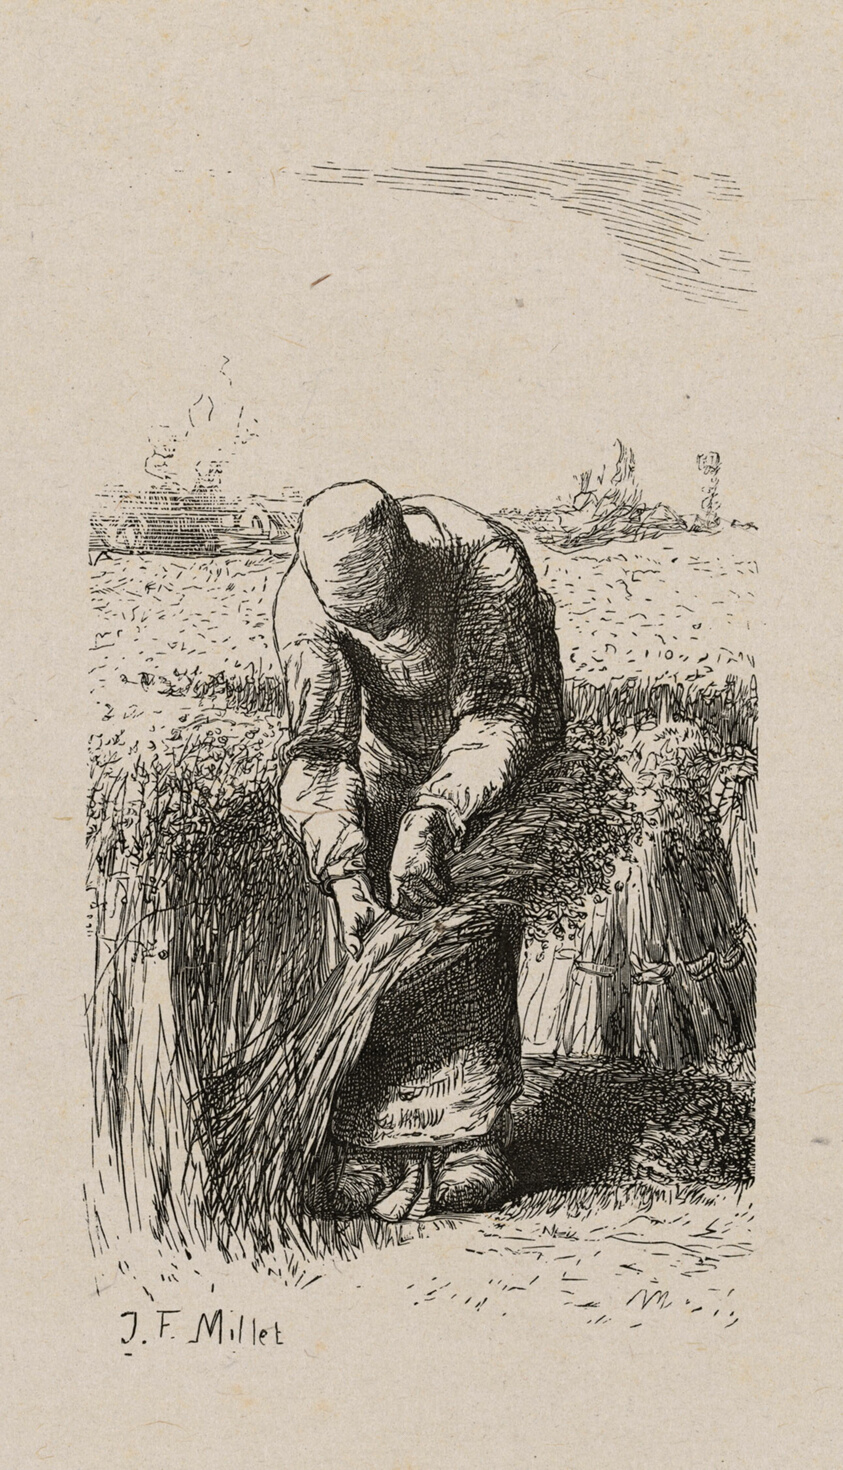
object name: Print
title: Woman Pulling Flax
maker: Jacques Adrien Lavieille (French, 1818-1862); after Jean François Millet (French, 1814-1875)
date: 1853, after drawing made in 1852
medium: Wood engraving in black on gray China paper, laid down on ivory wove paper (chine collé)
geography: France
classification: wood engraving; print; prints and drawing